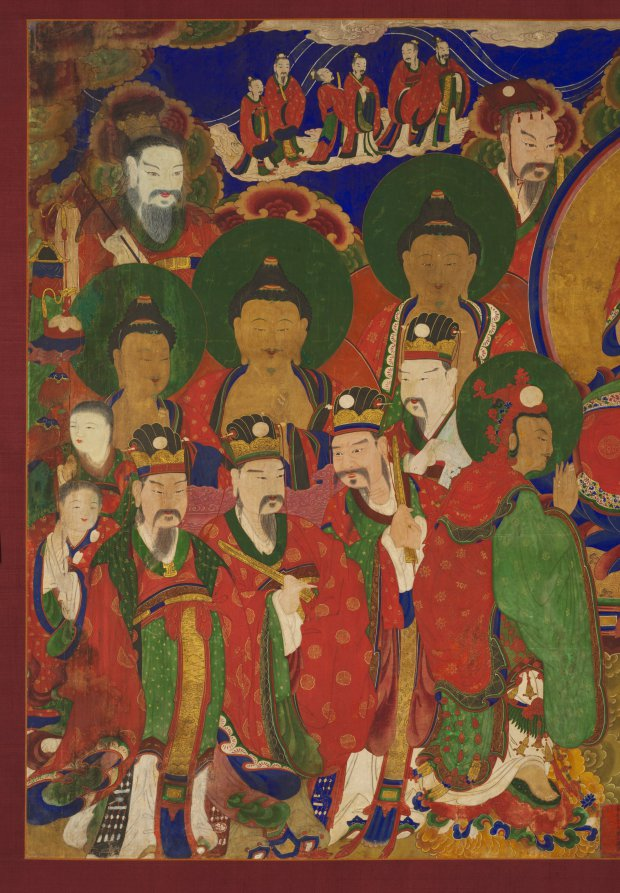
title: The Assembly of Tejaprabha Buddha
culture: Korea, Joseon dynasty (1392–1910)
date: 1878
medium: hanging scroll; ink, color, and gold on silk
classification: Painting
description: The main deity seated at the center is Tejaprabha, the Buddha of Radiant Light. Blazing beams of light emanating from its celestial body are this deity’s weapon to crush all kinds of calamities. Coincidently, when this painting was created, Korea was experiencing a height of foreign military aggressions, including invasions by the French (1866) and the US (1871). The inscription at the bottom center states that a group of ladies from the royal court commissioned the scroll to wish for the well-being of their families. During the late Joseon dynasty, Korean women became largely marginalized. Nevertheless, they remained important patrons of Buddhist art and architecture, voicing their concerns for their country and families in peril.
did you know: The central Buddha of Radiant Light is flanked by two attendant bodhisattvas, Sunlight and Moonlight, each in reverence posture.